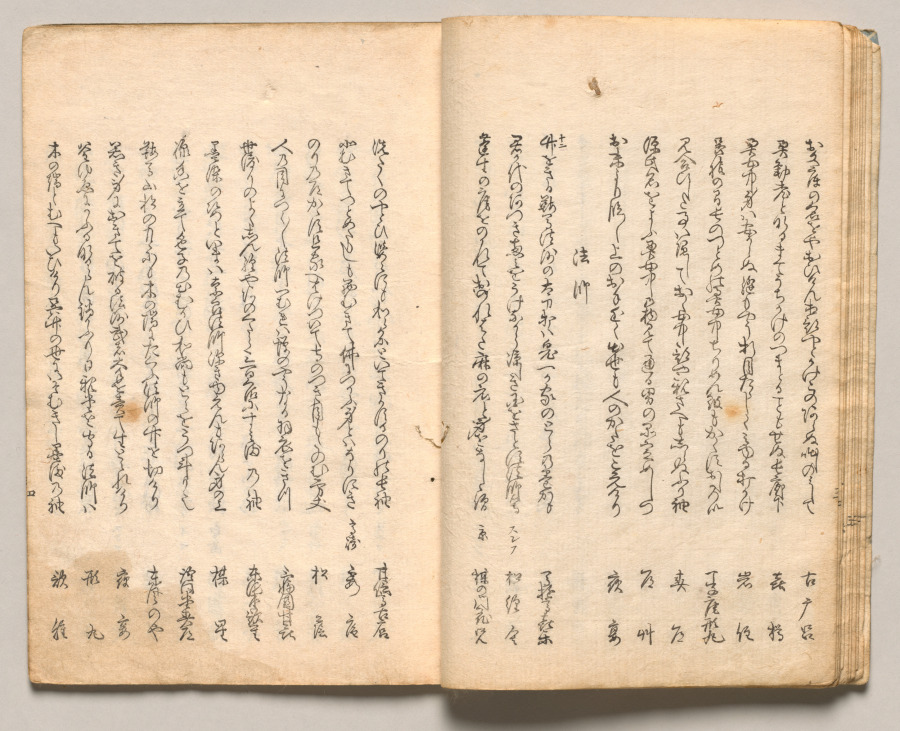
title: Spread Eleven from Volume Two of People of Japan in Light Verse (Kyōka)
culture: Japan, Edo period (1615–1868)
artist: Utagawa Hiroshige (Japanese, 1797–1858)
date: 1857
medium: Woodblock-printed book; ink and color on paper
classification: Bound Volume